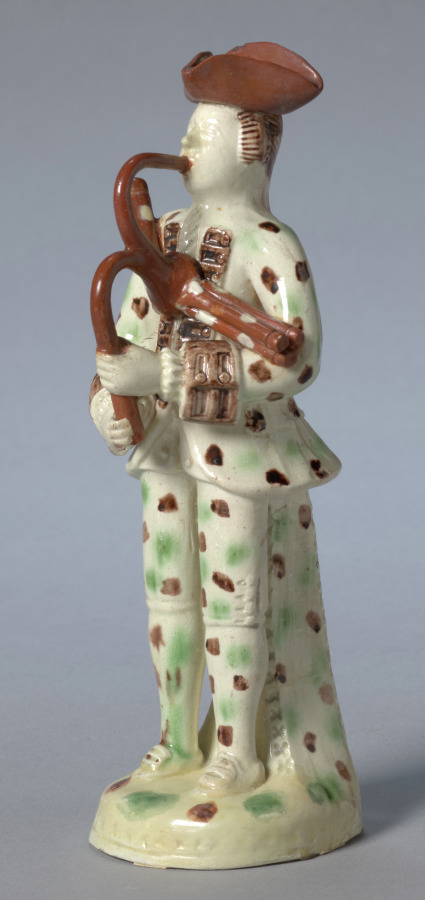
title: Bagpiper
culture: England, Staffordshire, 18th century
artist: Staffordshire Factory (British)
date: c. 1740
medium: earthenware (Astbury-Whieldon type)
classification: Ceramic